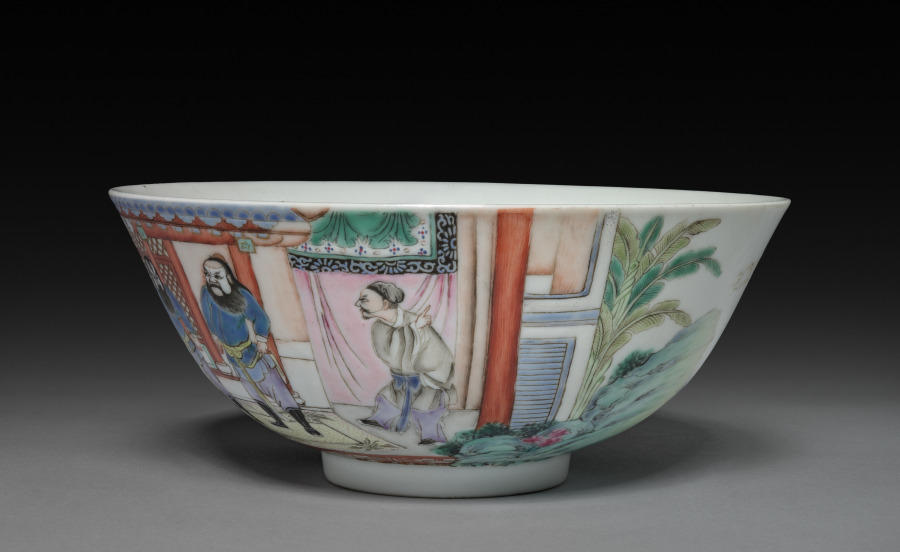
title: Five-color Bowl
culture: China, Qing dynasty (1644-1911), Daoguang reign (1821-1850)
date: 1821–1850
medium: porcelain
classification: Ceramic